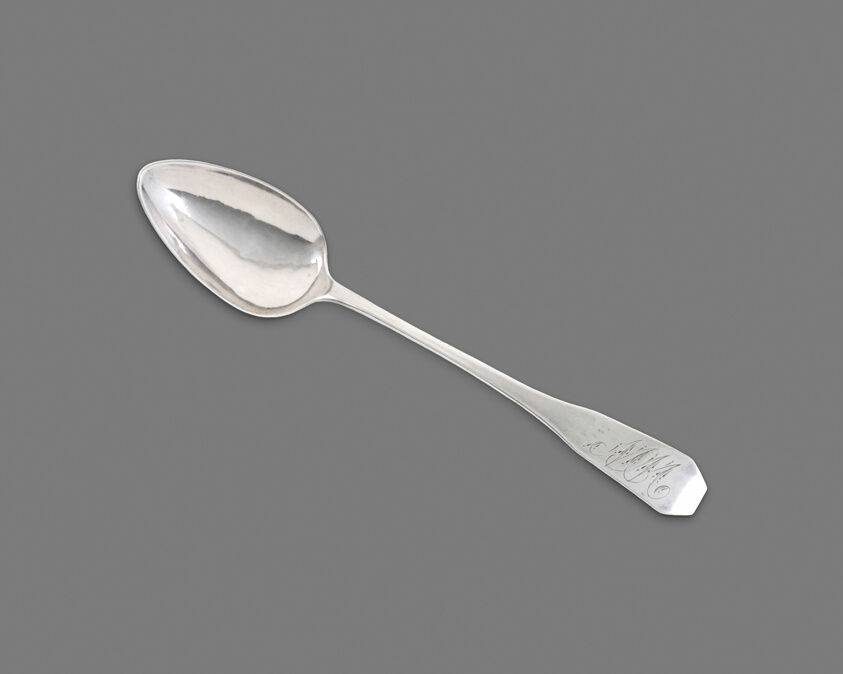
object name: Metalwork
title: Teaspoon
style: 19th century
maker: Isaac Hutton (American, 1767–1855); Albany, New York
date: c. 1805–15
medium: Silver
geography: Albany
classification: spoon; silver; utensil; american decorative arts; american arts; decorative arts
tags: dining, spoon